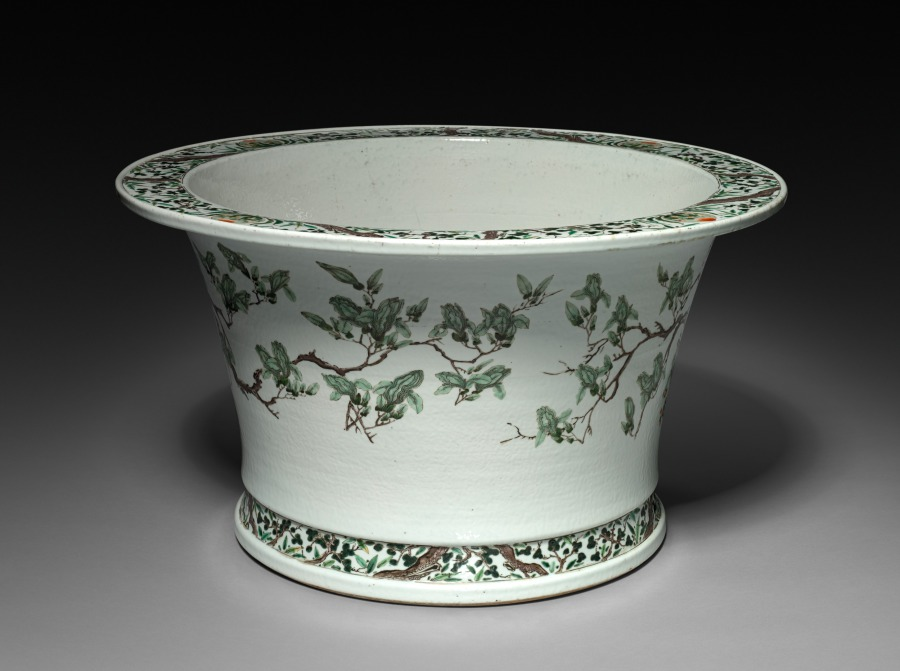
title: Jardiniere with Birds on Flowering Branches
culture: China, Jiangxi Province, Jingdezhen kilns, Qing dynasty (1644–1911), Kangxi reign (1661–1722)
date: 1662–1722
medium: porcelain with famille verte overglaze enamel decoration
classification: Ceramic